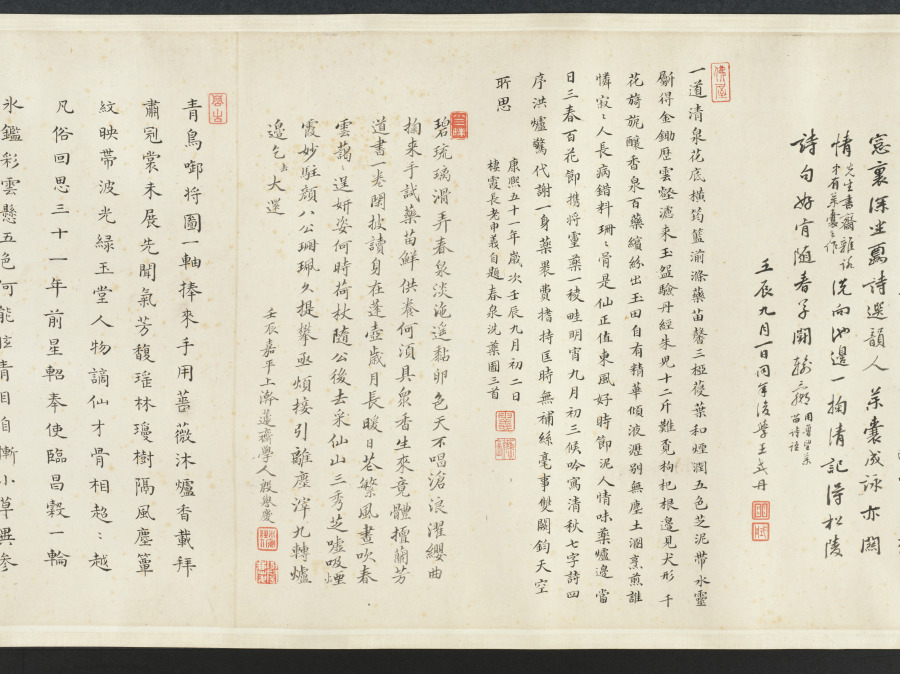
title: Cleansing Medicinal Herbs in the Stream on a Spring Day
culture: China, Qing dynasty (1644-1911)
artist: Yu Zhiding (Chinese, 1647–c. 1716)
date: 1703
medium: Handscroll; ink and color on silk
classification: Painting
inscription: Title by Chen Yixi.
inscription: 姑射仙人冰雪膚，新詩傳唱滿通都。/ 極知遲暮難為別，更展春泉洗藥圖。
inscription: Colophon by Chen Tingjing 陳廷敬 (1639–1712). Colophon by Wang Hongxu 王鴻緒 (1645–1723), dated 1707. Colophon by Song Luo 宋犖 (1634–1714). Colophon by Liu Yan 劉巗. Colophon by Jing Xikui 涇西夔. Colophon by Liu Yan 劉巗. Colophon by Cao Yin 曹寅. Colophon by Wang Shihong 汪士鋐. Colophon by Wang Shidan 王式丹 (1645–1718), dated 1712. Colophon by Shi Shenyi 史申義 (1661–1712), dated 1712. Colophon by Yin Yuqing 殷餘慶, dated 1712.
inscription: Colophon by Chen Shixia 陳時夏, dated 1729.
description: A famous portraitist, Yu Zhiding here depicts the likeness of Shi Shenyi 史申義 (1661–1712), an official and poet. Master Shi, a sickly man, was deeply interested in medicinal science. The opening section of the scroll features a boy washing a fungus in fresh spring water, a basket of medicinal herbs by his side. Other servants carry a fan, a bundle of scrolls, and a cup of tea or hot wine. Master Shi sits in a bamboo grove, surrounded by fields of herbs. Returning swallows, pink peach blossoms, and blooming magnolia indicate spring, whereas the fungus conveys wishes for long life. The spring theme may express the artist’s wish for his friend’s recovery.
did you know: In the pavilion are some of Shi Shenyi’s scholarly accoutrements: a stack of books, an antique zun 尊 (wine vessel), a brush holder, an ink stone, and a small chime.